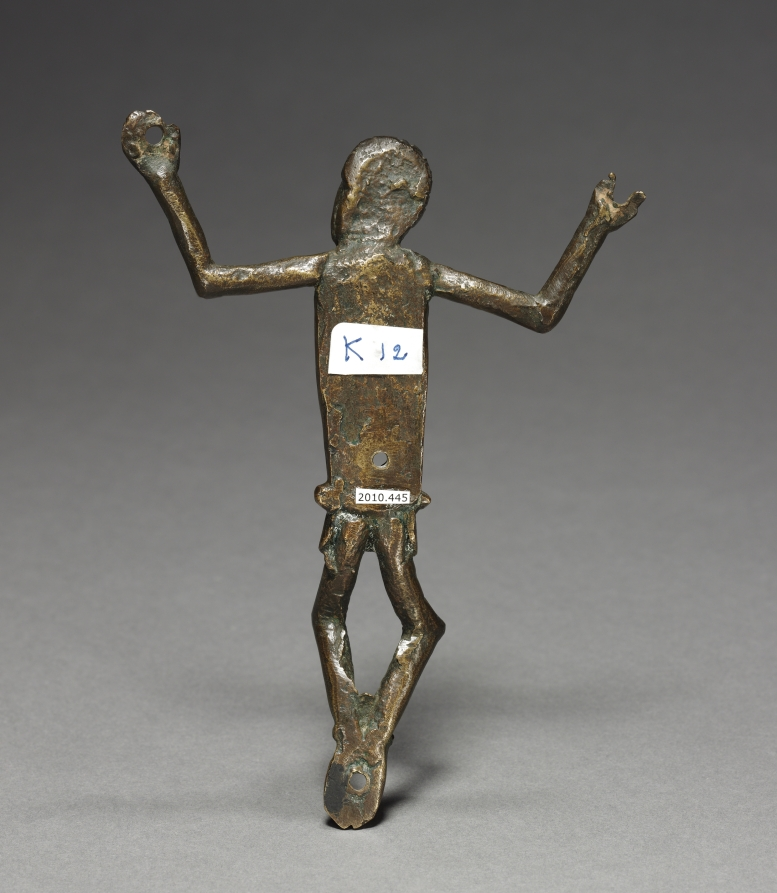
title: Corpus (Crucified Christ)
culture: Central Africa, Democratic Republic of the Congo or Cabinda, Kongo people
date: late 1800s-early 1900s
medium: Copper alloy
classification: Sculpture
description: One of two Christian-inspired objects in the Delenne collection identifying the far-reaching networks of trade, diplomacy, religion, and cross-cultural exchange. Kongo Christian symbols were created as spiritual tools to help explain and alleviate the turbulent situation between Central African religion and Catholicism. This figurine is geometric in style, combining both Christian ideals and preexisting Kongo artistic practices. Its pierced hands and feet link him to crucifixion images.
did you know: This figure combines Kongo artists’ attention to symmetry with the Western depiction of Christ, lifeless on the cross.